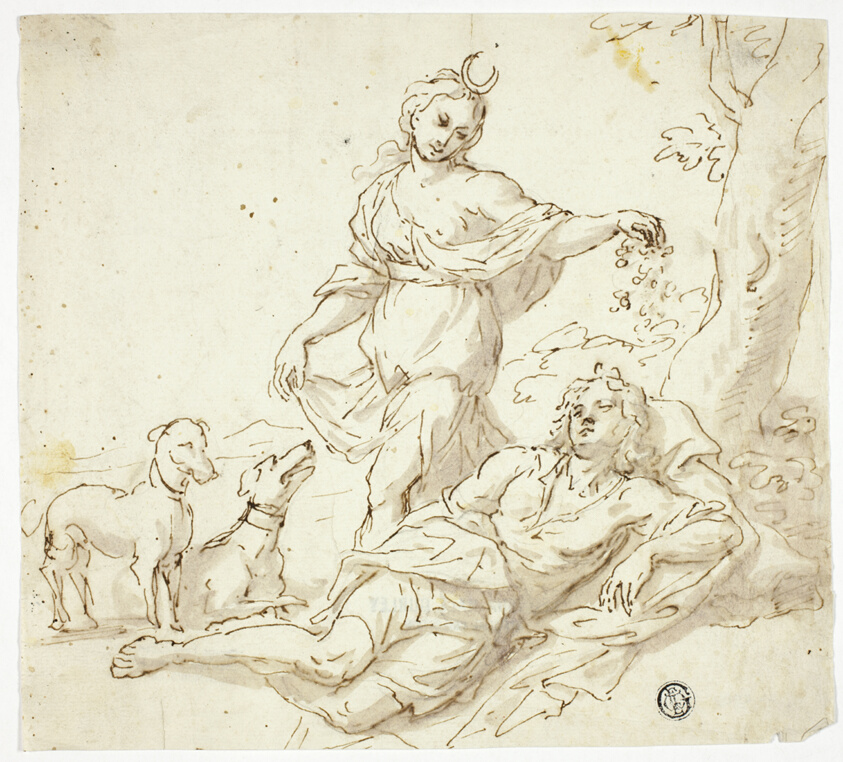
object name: Drawing and Watercolor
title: Diana and the Endymion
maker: Style of Francesco Monti (Italian, 1685-1768); or circle of Raymond de Lafage (French, 1656-1690)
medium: Pen and brown ink, with brush and brown wash, over traces of black chalk, on ivory laid paper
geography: Italy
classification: pen and ink drawings; drawings (visual works); prints and drawing